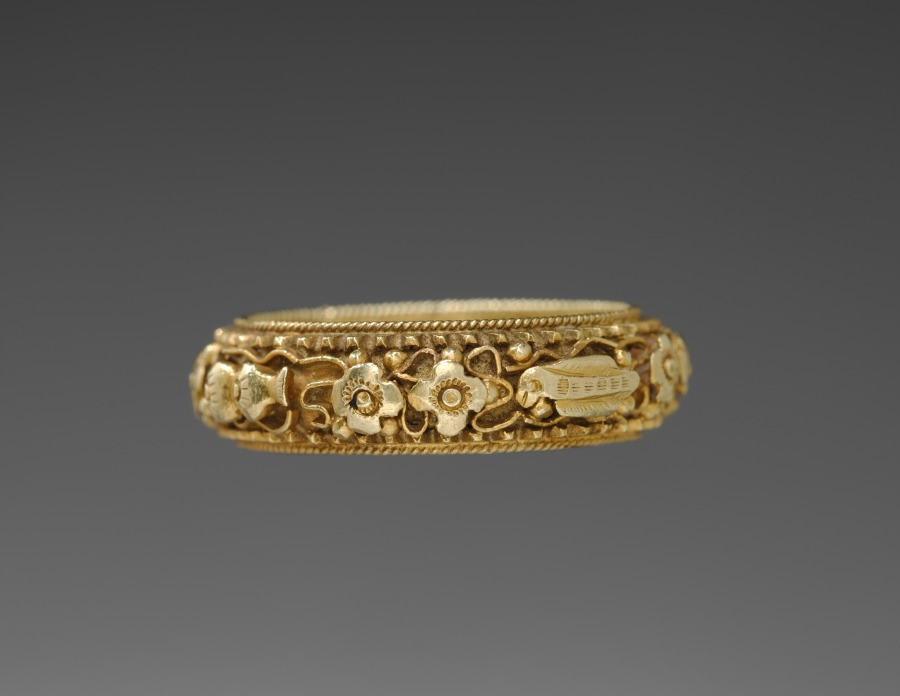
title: Ring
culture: Cambodia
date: 1800s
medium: gold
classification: Jewelry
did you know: This gold ring is encircled with flowers in relief.